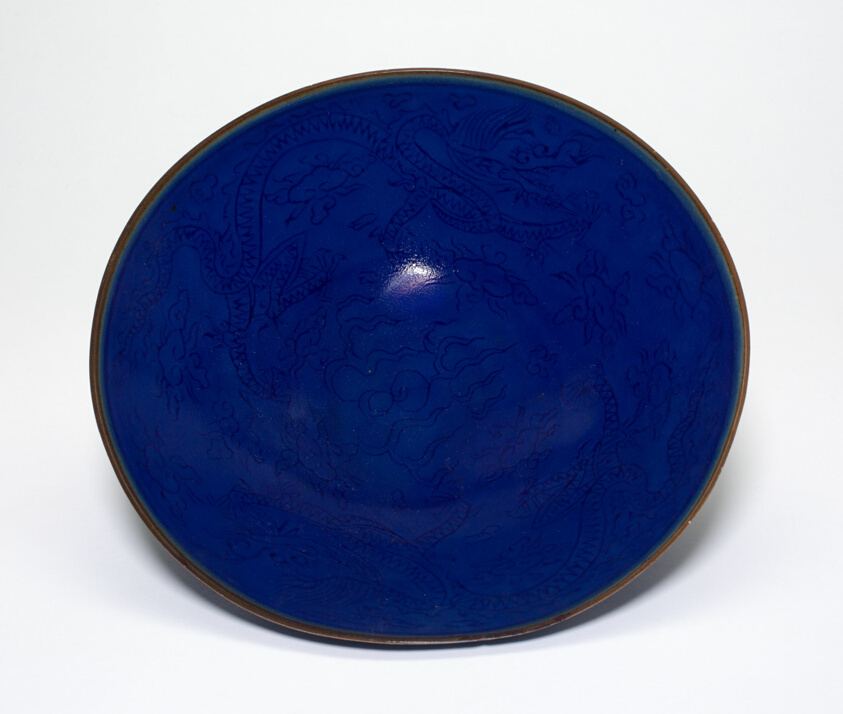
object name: Vessel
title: Low Bowl with Dragons amid Clouds Chasing Flaming Pearls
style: Chinese (culture or style)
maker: China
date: Ming dynasty (1368–1644)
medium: Porcelain with royal blue glaze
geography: China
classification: bowl; stoneware; dish (vessel); asian art; ceramics; vessel